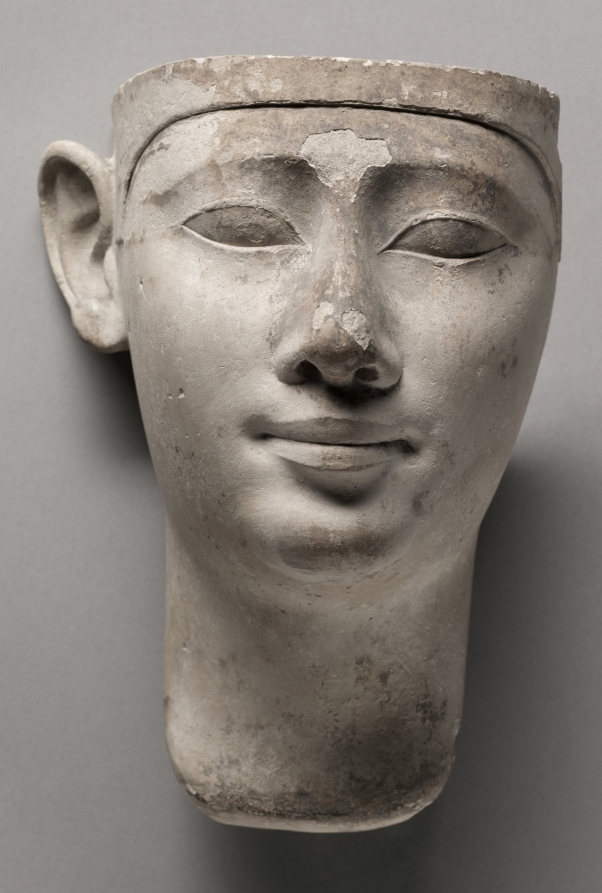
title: Votive Head of a King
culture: Egypt, Greco-Roman period (332 BCE–395 CE), reign of Ptolemy II Philadelphus (285–246 BCE)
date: 305–246 BCE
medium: limestone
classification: Sculpture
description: The browband, part of a royal headdress, identifies this fine head as a king. Curiously this head is in limestone, one of very few in this medium. They are fairly common in plaster. This one, apparently in imitation of its plaster prototypes, has been hollowed out; the gouging marks are still clearly visible. The portrait type is most closely associated with Ptolemy II. An exact date, however, is speculative at best as features like this occur as early as Dynasty 29.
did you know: The purpose of this sculpture is not known; it is assumed that this and others like it were votive offerings in honor of the king.